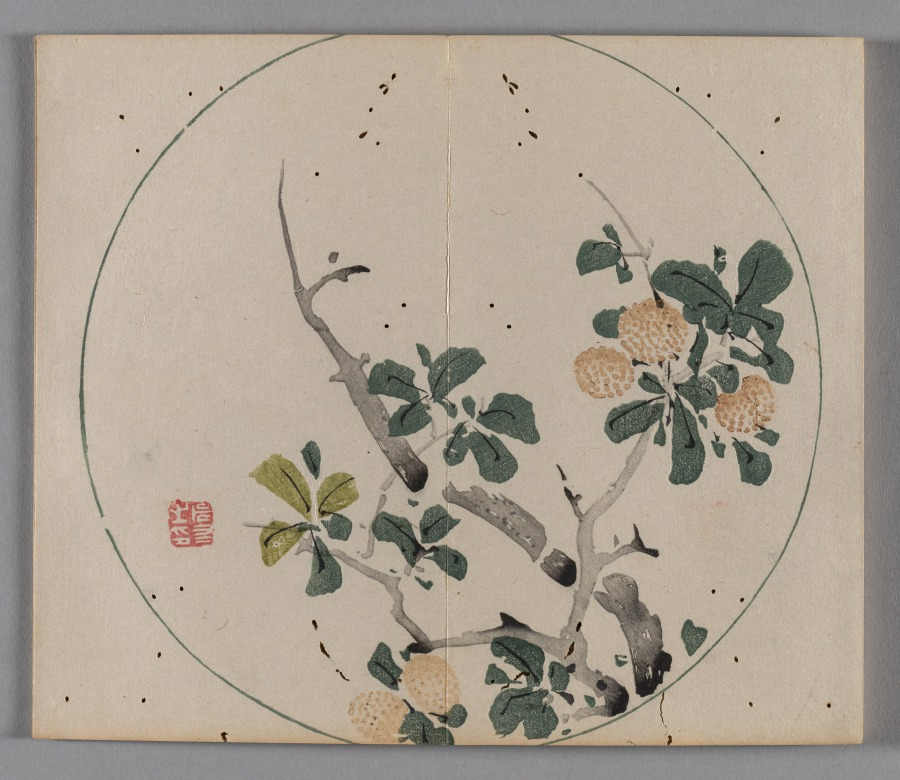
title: Ten Bamboo Studio Collection of Calligraphy and Painting: Round Fans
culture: China, Qing dynasty (1644-1911)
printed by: Hu Zhengyan (Chinese, c. 1584–1674)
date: 1633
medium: Woodblock-printed book; ink and colors on paper; first edition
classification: Print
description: Color printing reached a level of perfection in the early 1600s, as seen in this Ten Bamboo Studio Collection of Calligraphy and Painting and the Mustard Seed Garden Manual of Painting (printed 1679 and 1701). The painterly quality, precision in registering (aligning) the woodblocks, and harmonious colors made them the most successful color print editions in Chinese history. Both editions were printed and compiled in Nanjing, spread nationwide, and had a great impact on the arts in Japan and Korea.